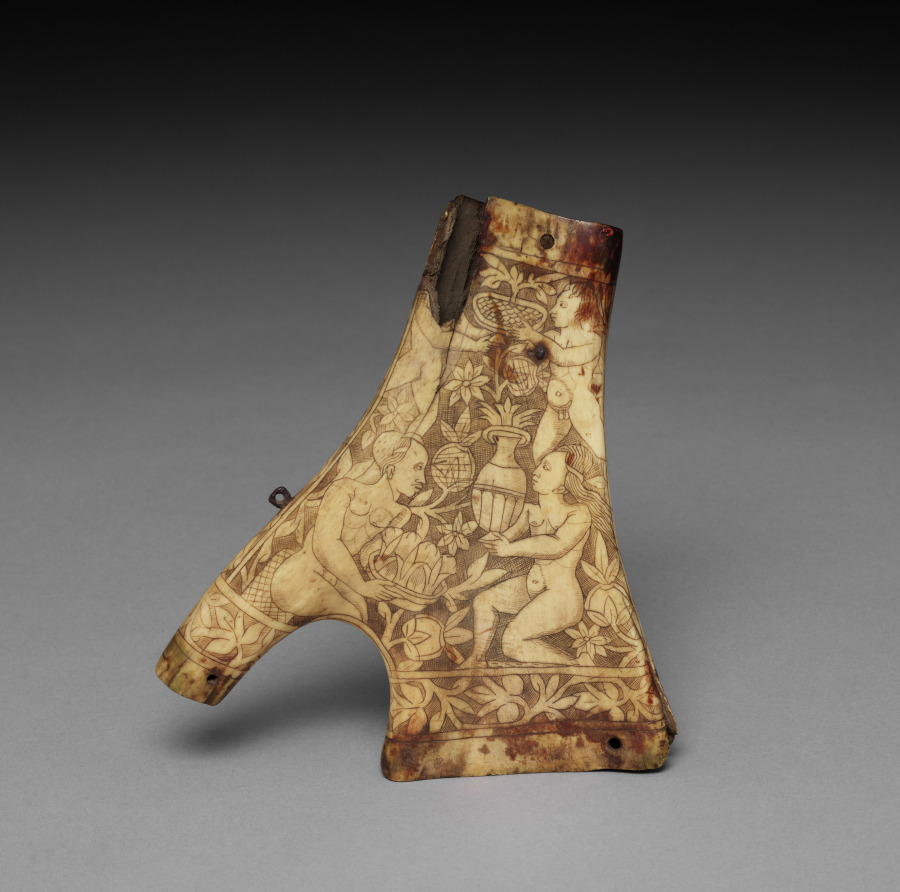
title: Powder Flask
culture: Germany, late 16th-early 17th century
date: c. 1575–1625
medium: horn (two branches); engraved allegorical scenes (unidentified); mounts missing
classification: Arms and Armor